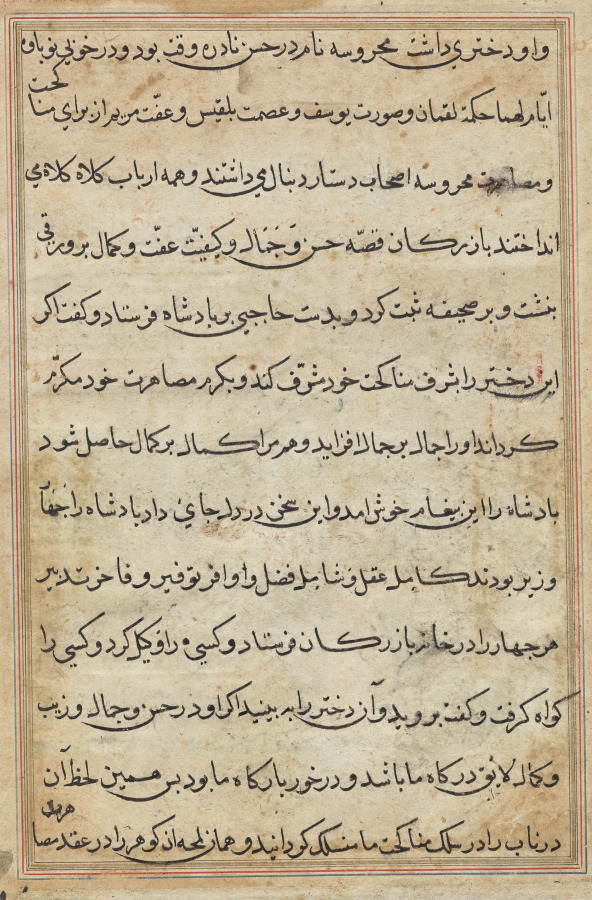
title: Page from Tales of a Parrot (Tuti-nama): text page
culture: Mughal India, court of Akbar (reigned 1556–1605)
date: c. 1560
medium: gum tempera, ink, and gold on paper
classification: Painting